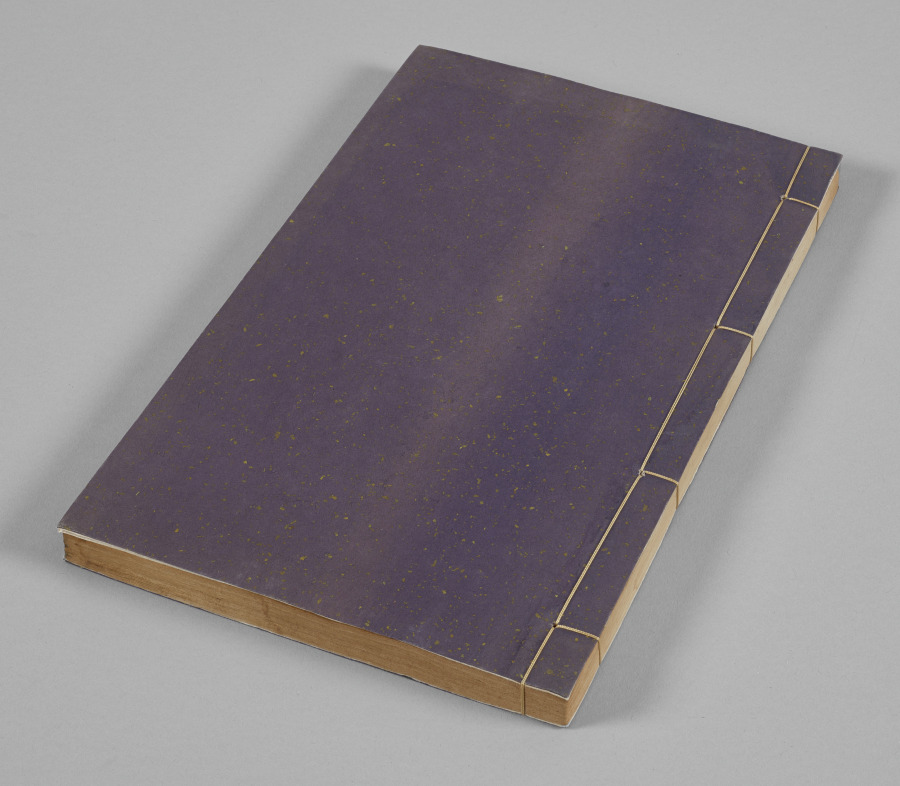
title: Yu-hai (The Ocean of Jade)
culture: China, Ming dynasty (1368–1644)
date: 1368–1644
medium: woodblock-printed book with painted edges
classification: Bound Volume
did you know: When each book is rolled to form a cylinder, a landscape appears on the edges, painted in ink and washes of color.